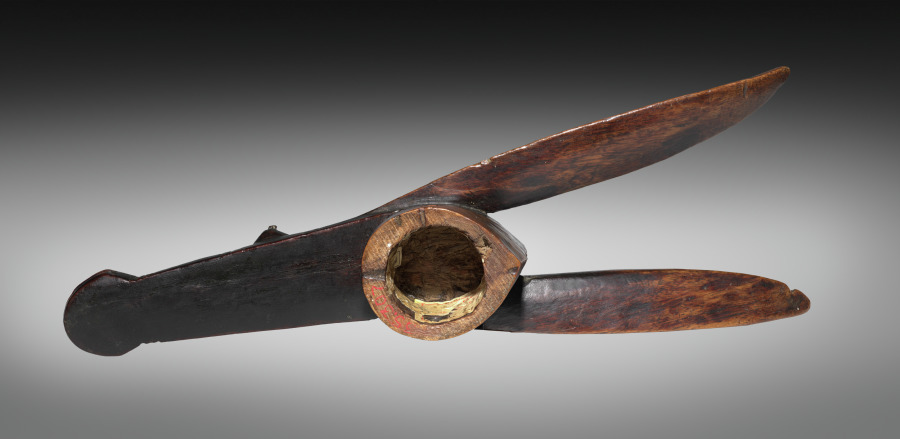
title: Head of a Hobbyhorse (korèdugaso)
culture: Africa, West Africa, Mali, Bamana blacksmith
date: late 1800s–early 1900s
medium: Wood and iron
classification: Sculpture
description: Pertaining to the male initiation society called Korè, this sculpture from the Koulikoro region represents the head of an aardvark and is part of a wooden hobbyhorse that is mounted by a ritual buffoon. The Korè initiates are divided into different classes, each having a designated mask. The ritual buffoons appear in pantomimes on different public occasions and poke fun at village authorities and other high-ranking individuals.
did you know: This is one of the best-known examples of a korèdugaso. It was featured on the catalogue cover for a 1935 exhibition at the Museum of Modern Art, one of the first on African arts in the US. It traveled to the CMA that same year.